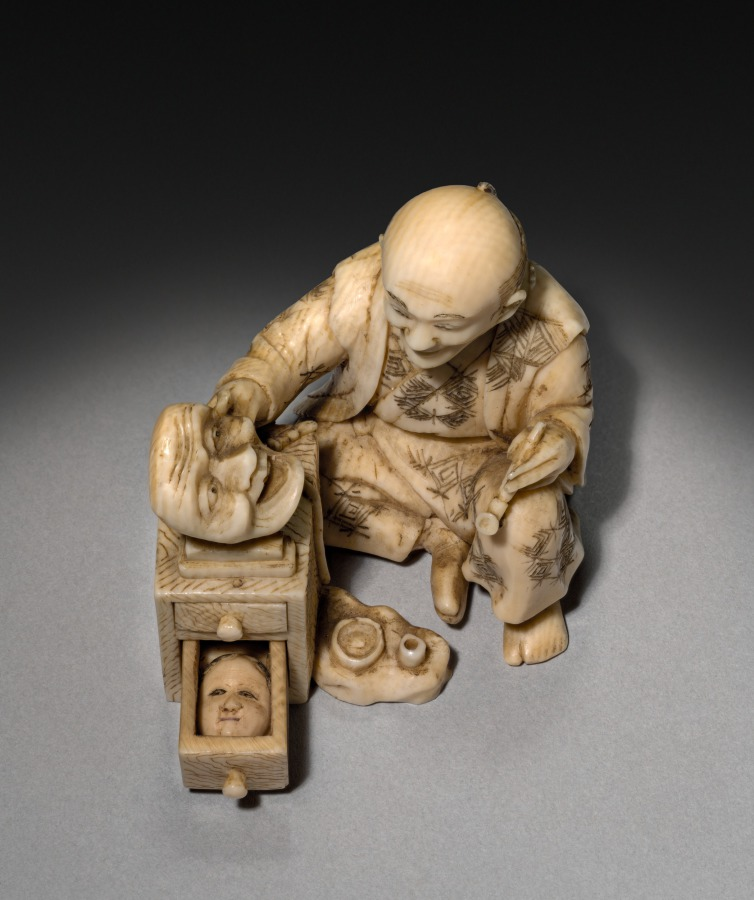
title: The Mask Maker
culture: Japan, Meiji period (1868–1912)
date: late 1800s to early 1900s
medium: ivory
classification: Ivory